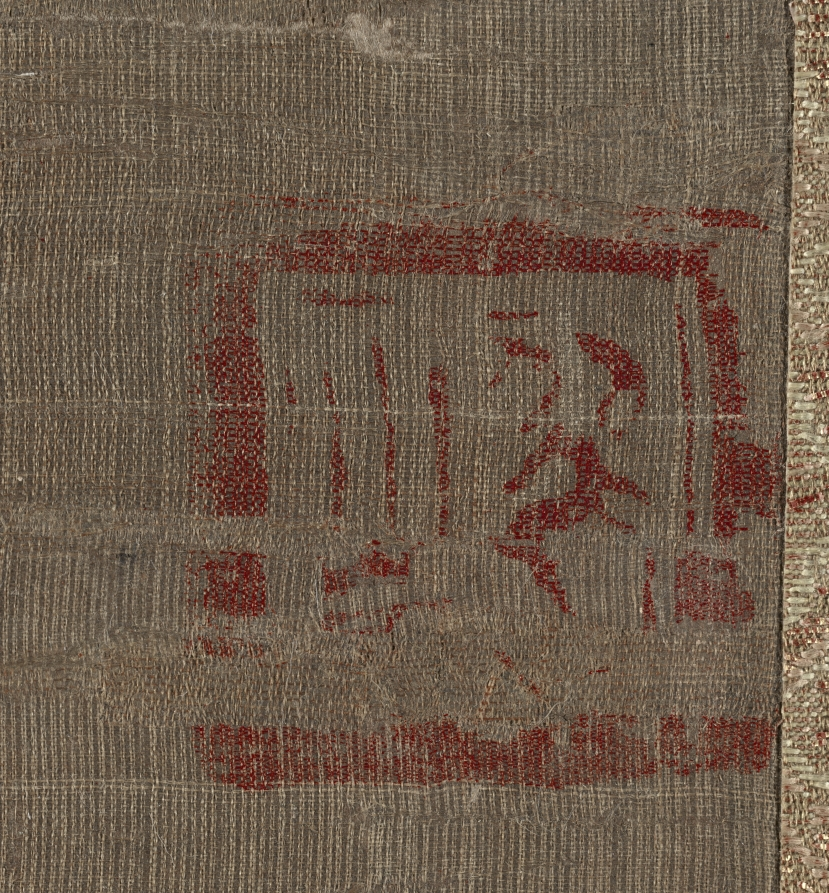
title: Bamboo in Four Seasons: Autumn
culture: China, Yuan dynasty (1271-1368)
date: 1279–1368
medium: hanging scroll, ink on silk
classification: Painting